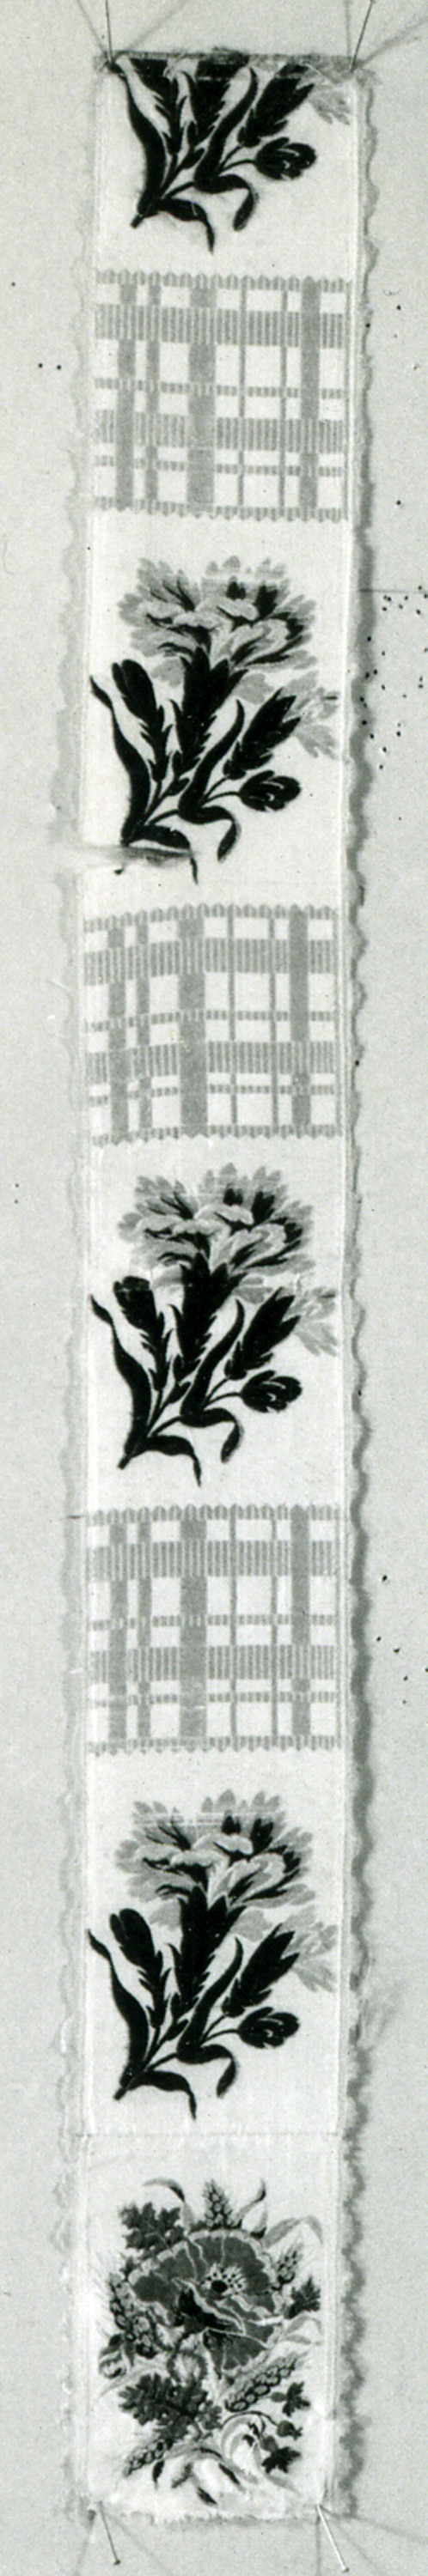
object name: Textile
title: Ribbon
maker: France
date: c. 1850/60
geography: France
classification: textile; weaving